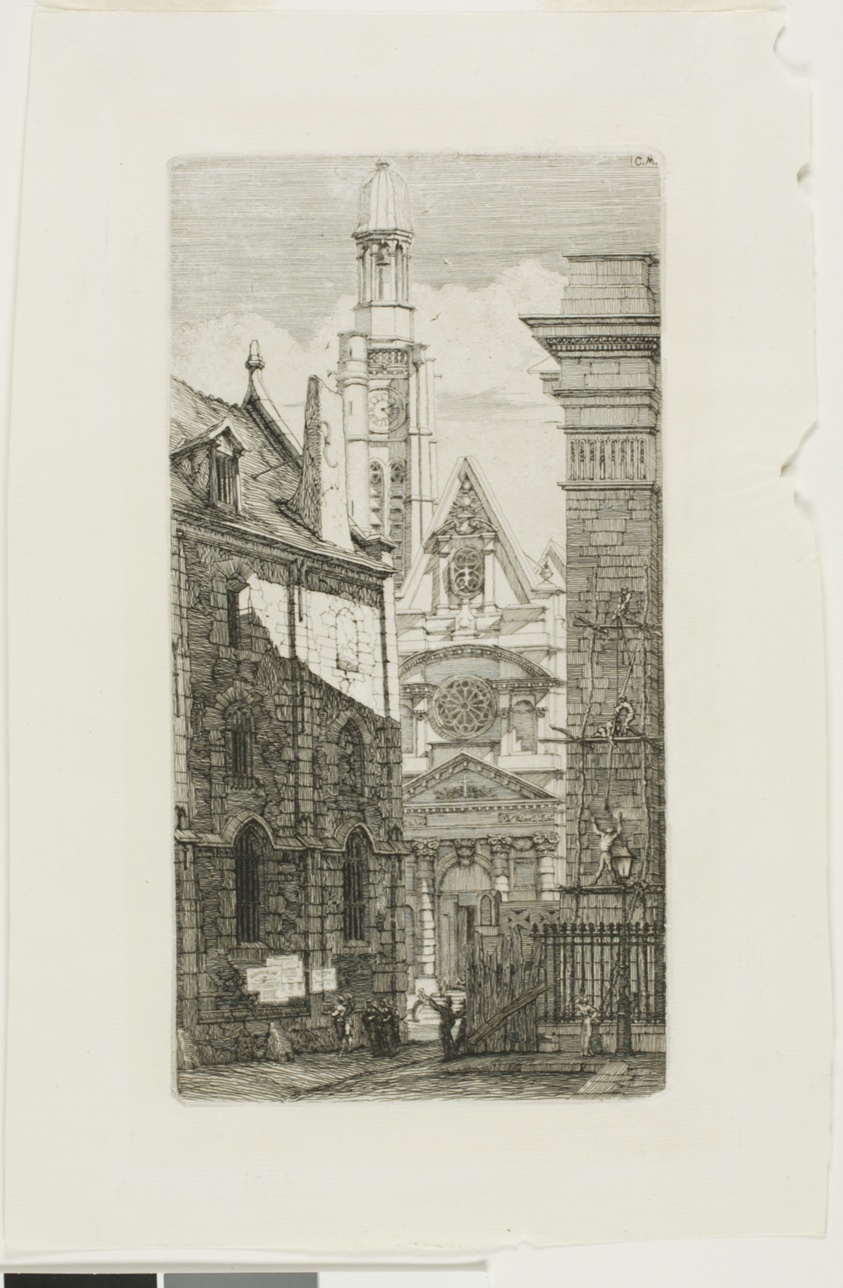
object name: Print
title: Church of St. Etienne du Mont, Paris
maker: Charles Meryon (French, 1821-1868)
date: 1852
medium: Etching on ivory wove chine, laid down on ivory laid paper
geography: France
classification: etching; print; prints and drawing